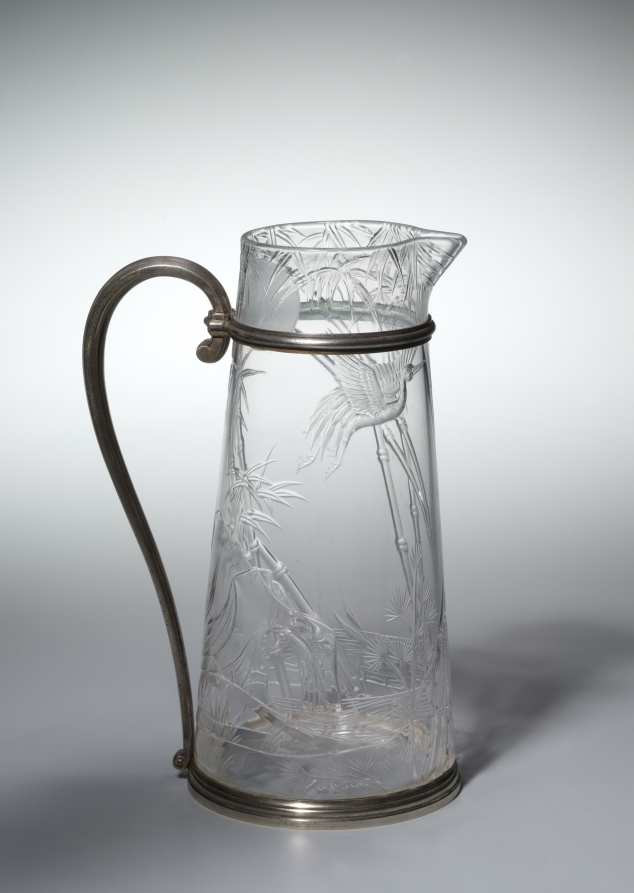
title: Pitcher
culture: France, 19th century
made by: Baccarat glasshouse (French)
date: c. 1880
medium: glass with metal mounts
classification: Glass